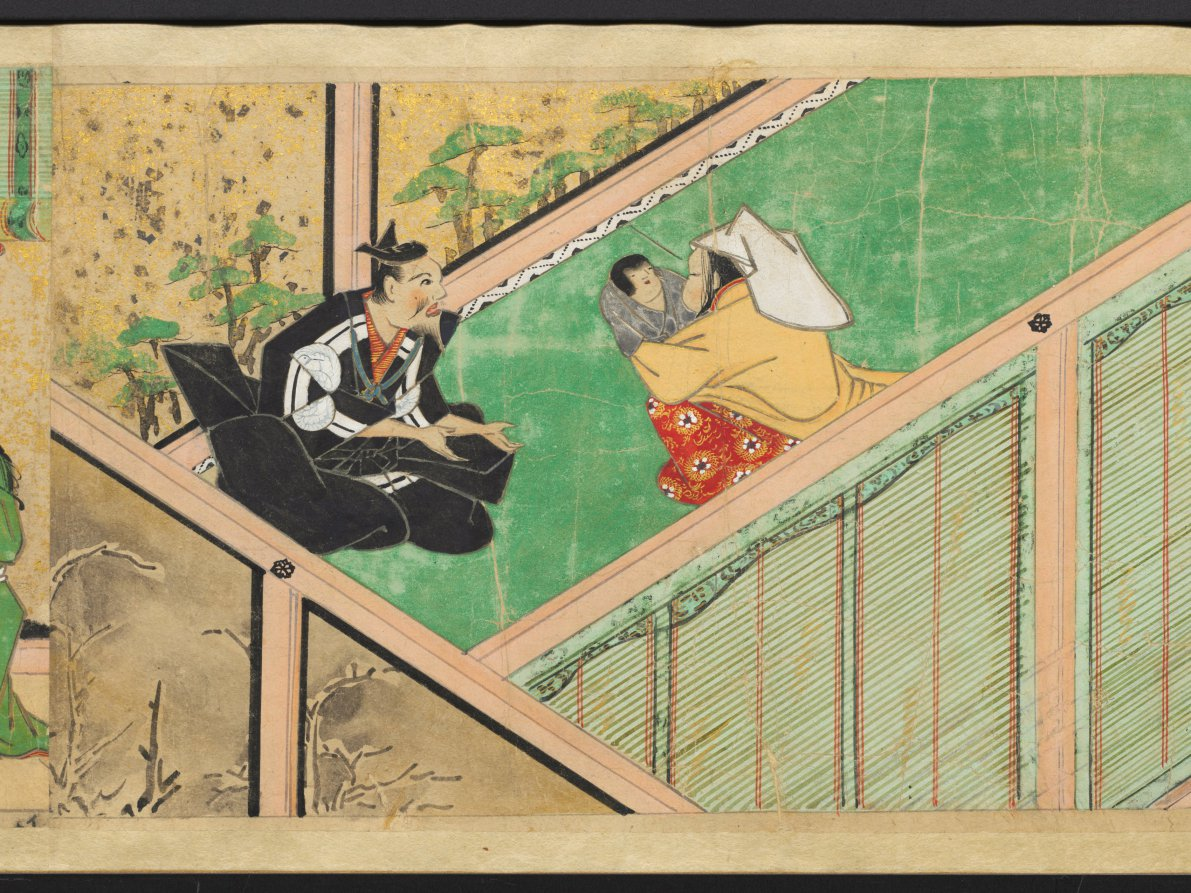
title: The Saltmaker's Story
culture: Japan, Edo period (1615–1868)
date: early 1600s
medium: One of a pair of handscrolls; ink, color, and gold on paper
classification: Painting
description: Once read and copied by girls at New Year’s celebrations and included in dowries, The Saltmaker’s Story is a rags-to-riches tale in which daughters are gifts from the gods. Despite his simple outlook, the main character progresses from humble roots as an associate at Kashima Shrine to the elite status of grandfather of the emperor through the intervention of the Kashima deity. The Saltmaker’s Story is traditionally presented in a set of three scrolls, but the text of this set has been removed by a previous owner, who remounted the illustrations as a pair. The paintings of this one take us from right to left through the first half of the tale.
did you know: This handscroll originally had texts before its paintings, but the texts were removed.